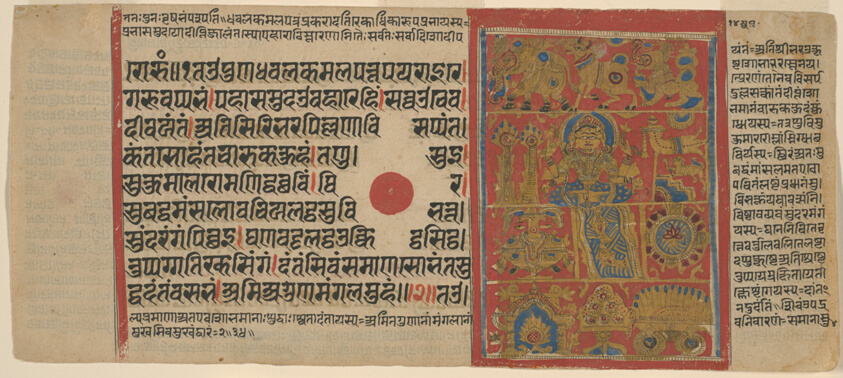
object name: Painting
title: Queen Trishala's Fourteen Lucky Dreams, from a copy of the Kalpasutra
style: South Asian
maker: India; Gujarat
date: c. 1475-1500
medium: Opaque watercolor, gold, and ink on paper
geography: India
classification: miniature painting; manuscript; asian art; painting